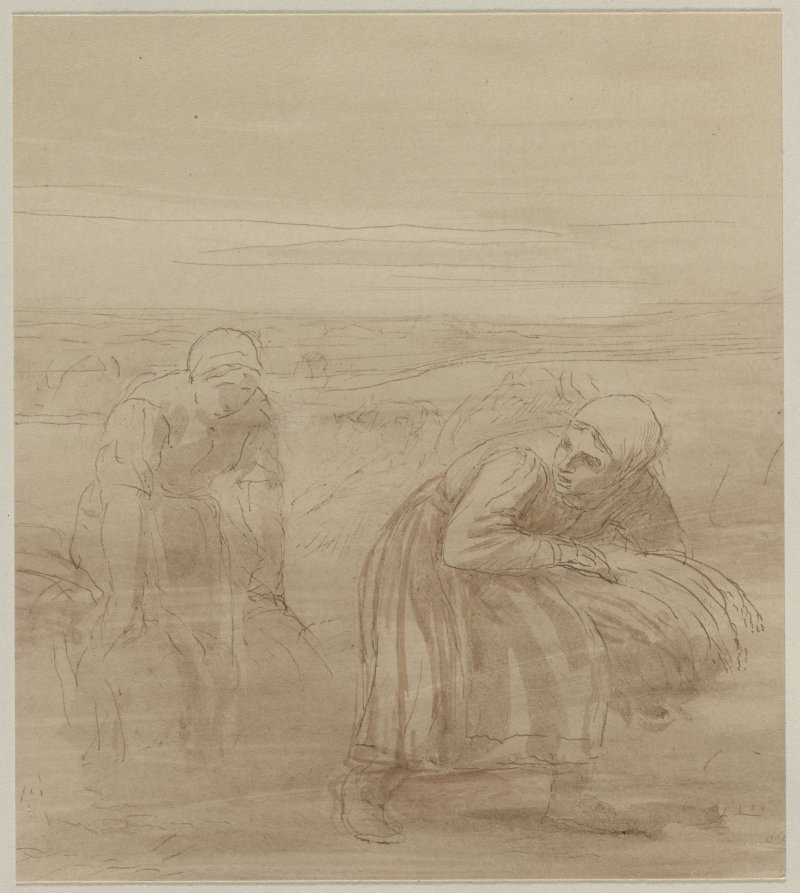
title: Les Glaneuses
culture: France, 19th century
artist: Alphonse Legros (French, 1837–1911)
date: 1800s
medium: sepia ink and wash on off-white paper, pastel down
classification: Drawing